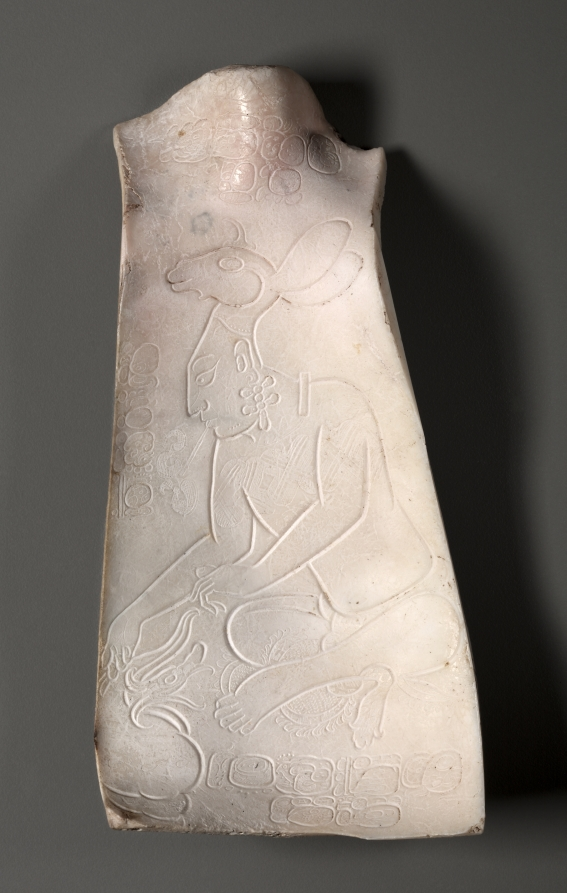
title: Shell with Seated Noble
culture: Mexico or Central America, Maya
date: 600–900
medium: conch shell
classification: Sculpture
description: This plaque, perhaps meant to be held in the hand for close viewing, is delicately incised with a ruler who leans toward a serpent-headed conch shell at the lower left. The lord, who smokes a cigar, is simply dressed in a loincloth; a band of body paint or tattoos appears on his chest.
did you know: A Maya nobleman smokes a cigar as he reaches toward a shell with a serpent.